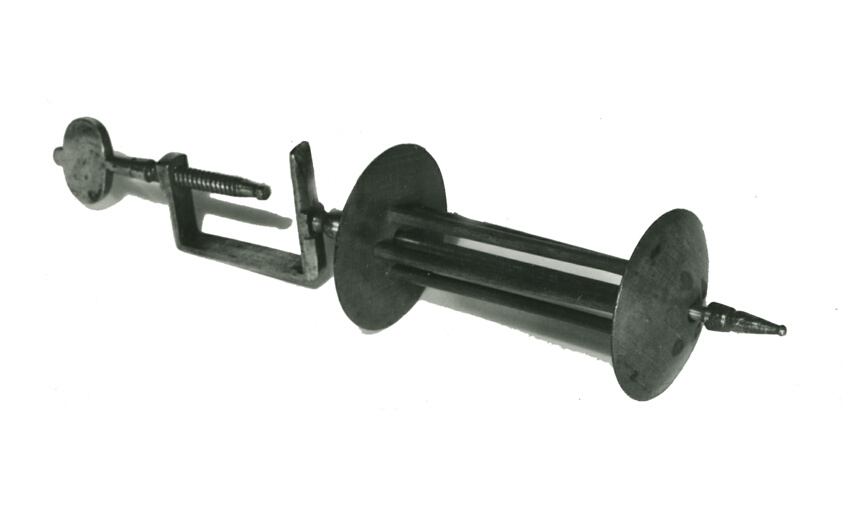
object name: Textile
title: Reel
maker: Europe or United States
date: 19th century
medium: Wood with metal vise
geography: Europe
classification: textile; weaving; textile working equipment